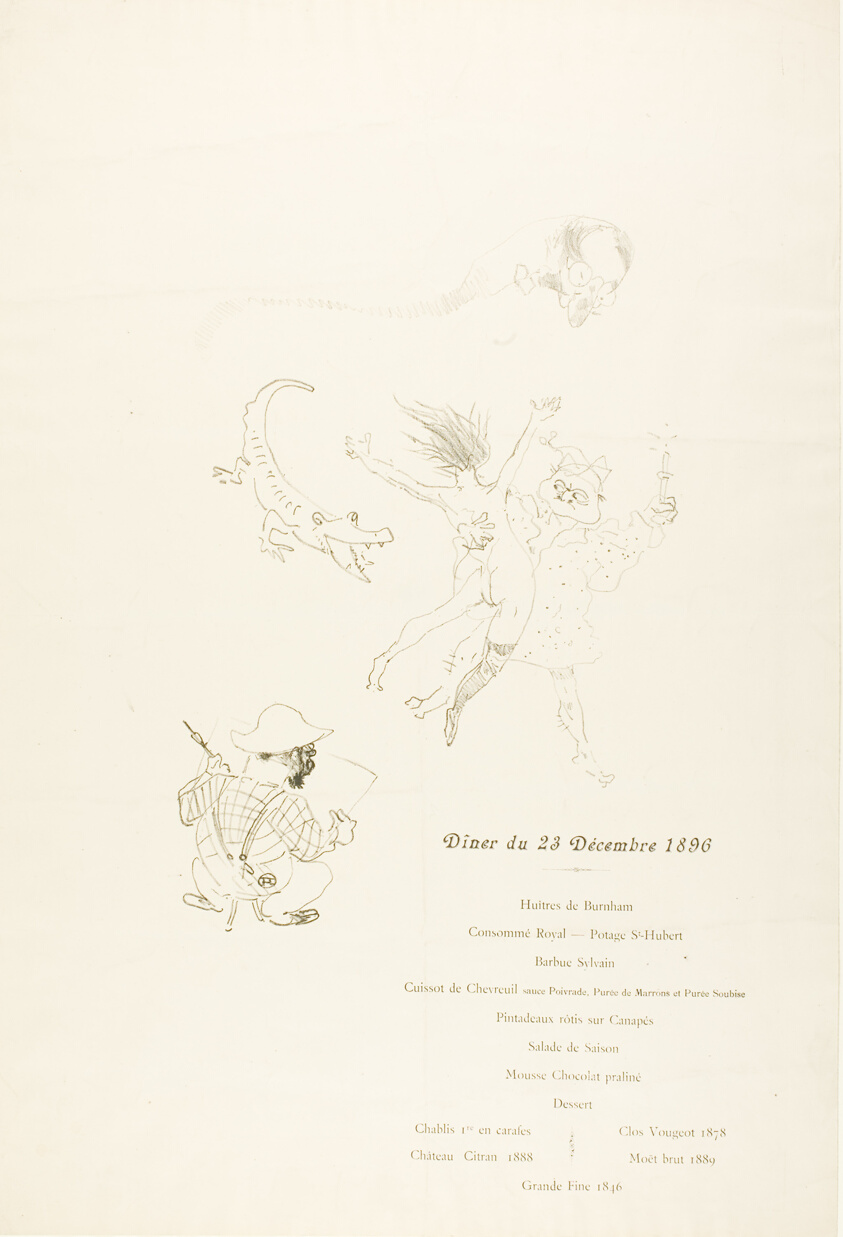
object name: Print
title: Le crocodile, Menu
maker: Henri de Toulouse-Lautrec (French, 1864-1901)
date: 1896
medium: Lithograph on cream wove paper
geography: France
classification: lithograph; print; prints and drawing